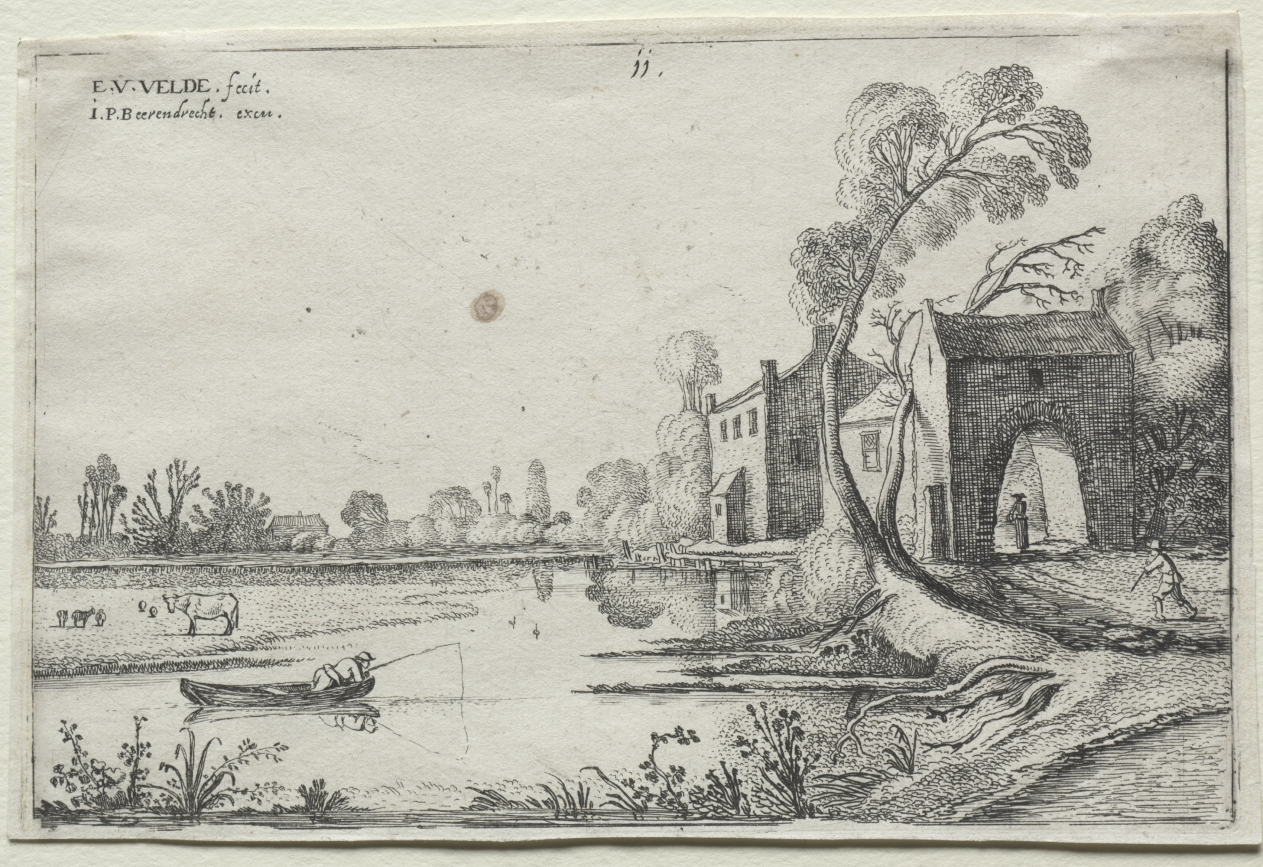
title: Landscape with a River and a Gatehouse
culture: Netherlands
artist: Esaias van de Velde (Dutch, 1587–1630)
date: 1614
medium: etching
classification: Print